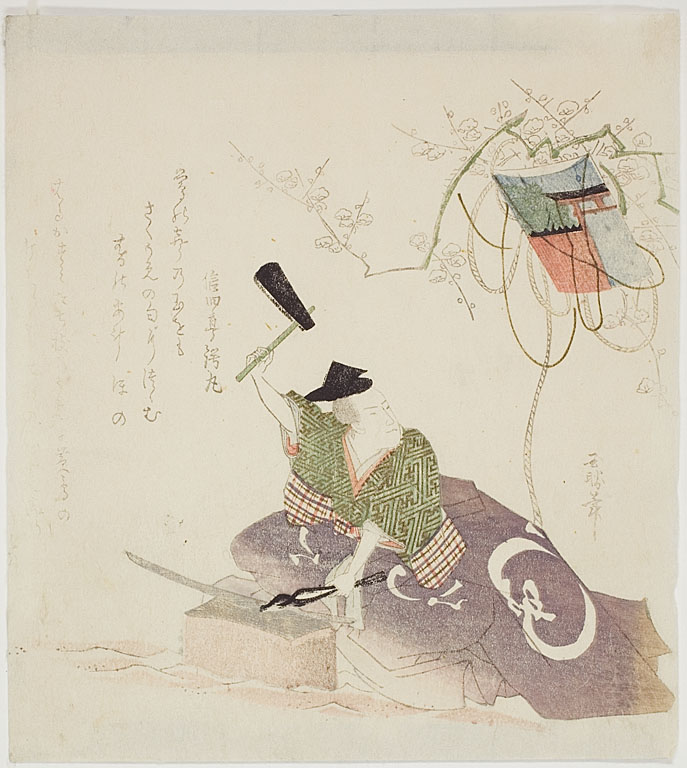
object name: Print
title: Masamune Forging the Sword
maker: Ryuryukyo Shinsai (Japanese, about 1764-1820)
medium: Color woodblock print; surimono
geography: Japan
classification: woodblock print; print; asian art